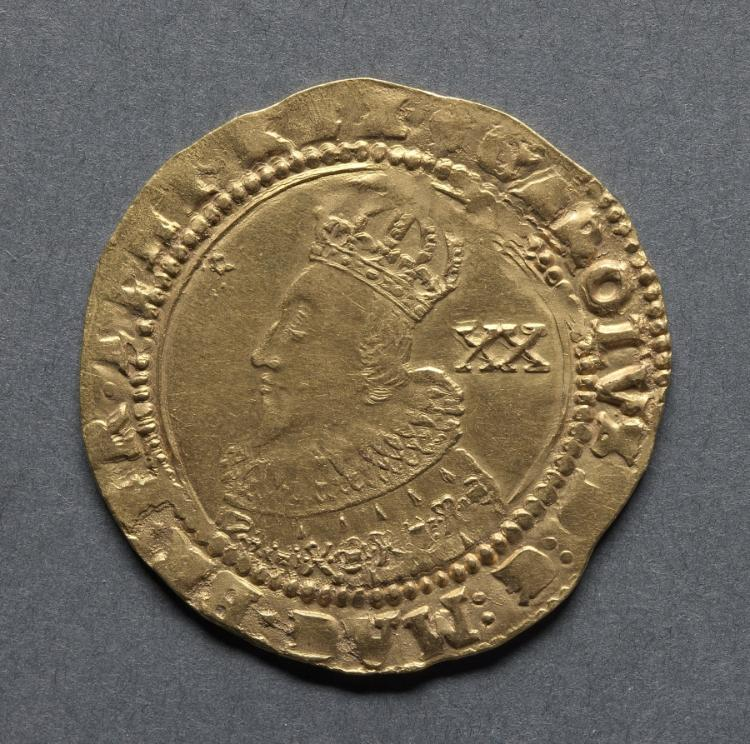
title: Unite: Charles I (obverse)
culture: England, Charles I, 1625-1649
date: 1625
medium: gold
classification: Coins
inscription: CAROLUS D G MAG BR FR ET HI REX. XX